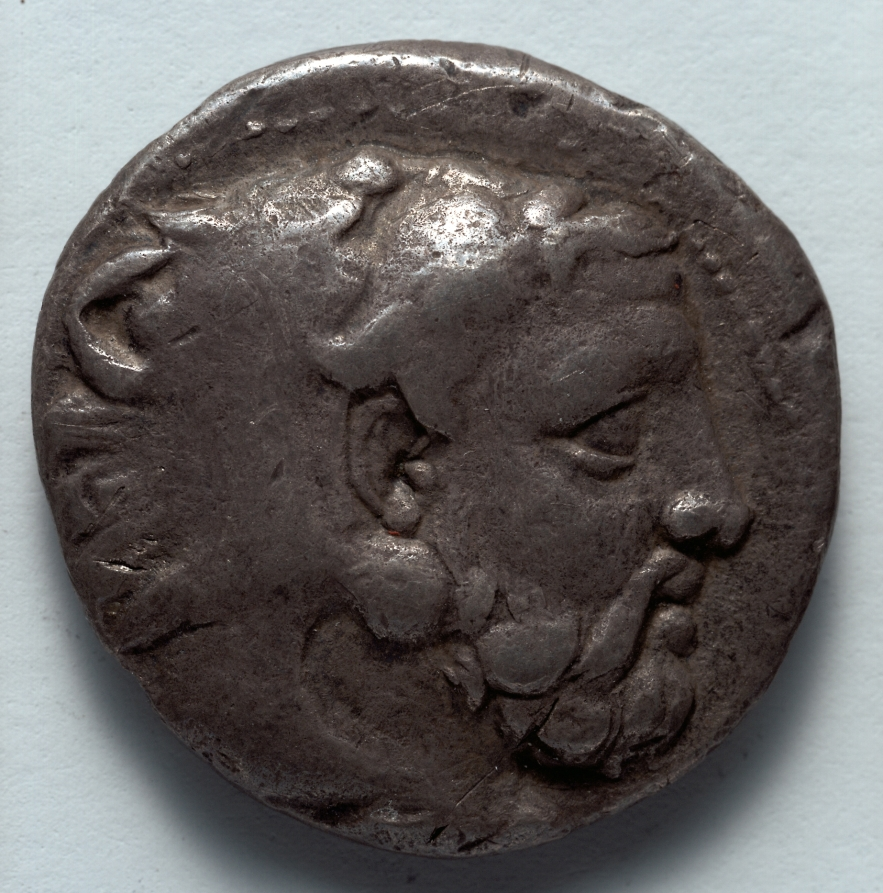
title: Stater: Head of Bearded Herakles (obverse)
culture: Greek, Macedonian, probably minted at Pella (Macedonia), reign of Amyntas III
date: 389–369 BCE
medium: silver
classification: Coins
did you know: Amyntas III was the father of Philip II and grandfather of Alexander III (the Great).